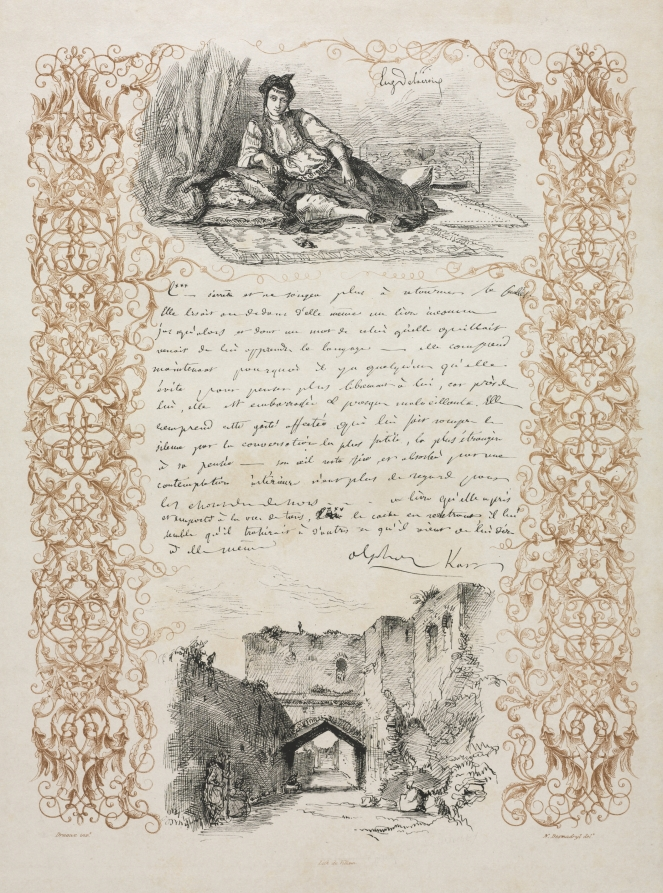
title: Jewess of Algiers and a Street in Algiers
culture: France, 19th century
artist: Eugène Delacroix (French, 1798–1863)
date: 1838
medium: lithograph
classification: Print